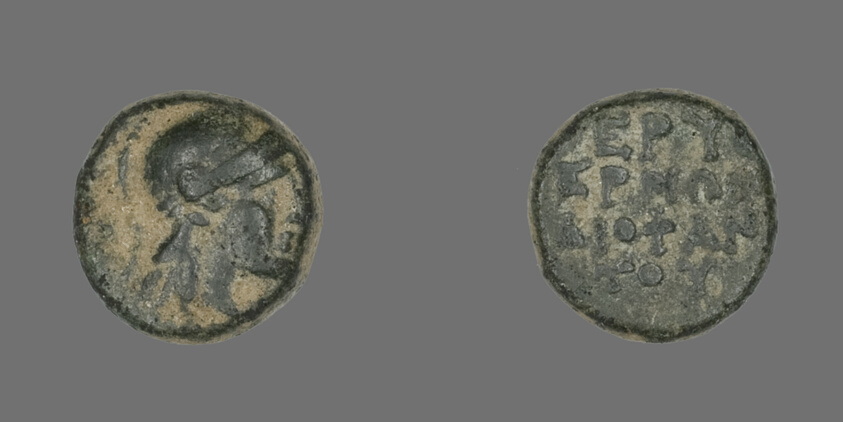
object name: Coin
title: Coin Depicting the Goddess Athena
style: greek, ancient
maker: Greek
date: about 300-200 BCE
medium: Bronze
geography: Ancient Greece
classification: coin; ancient art